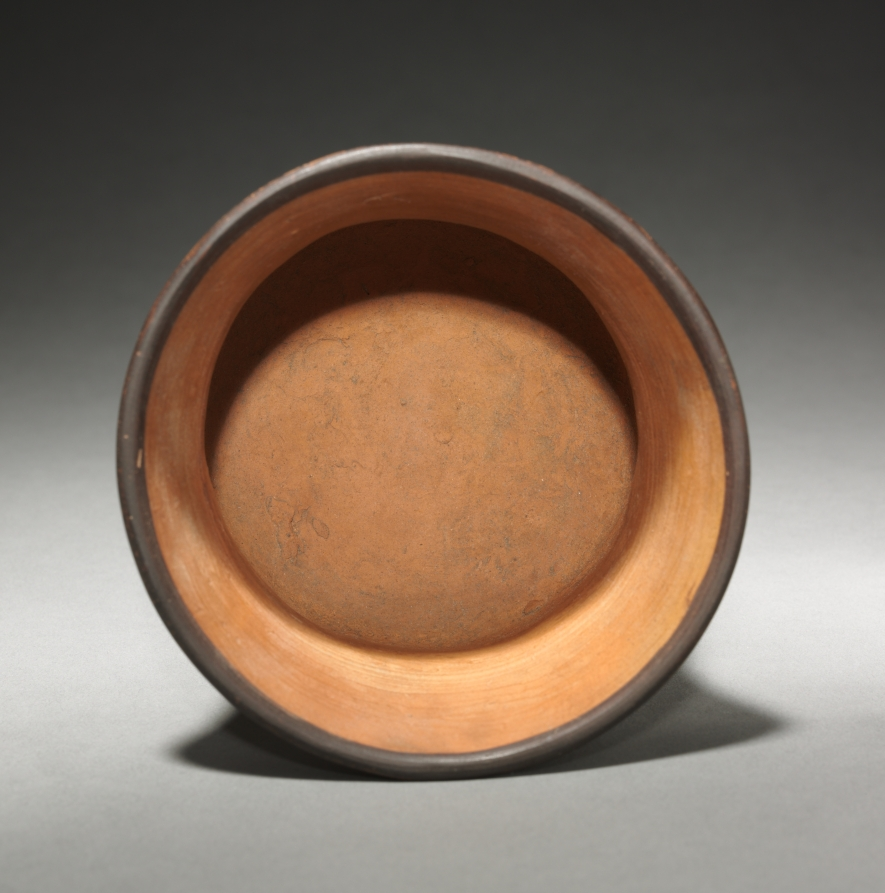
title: Bowl with Trophy Heads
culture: Peru, Nasca, Early Intermediate Period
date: c. 100–650 CE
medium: ceramic, slip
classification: Ceramic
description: Nasca is one of the two major cultures and ceramic styles of its periods, and one of the finest ceramic styles ever produced in the South American Andes. Vessel walls are thin, firing temperatures higher than in earlier times, and a variety of warm, earthen-toned slips come into use. This small bowl features repetitions of human trophy heads—a major Nasca motif that refers both to war and fertility.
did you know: Two important themes in Nasca art are war and fertility.